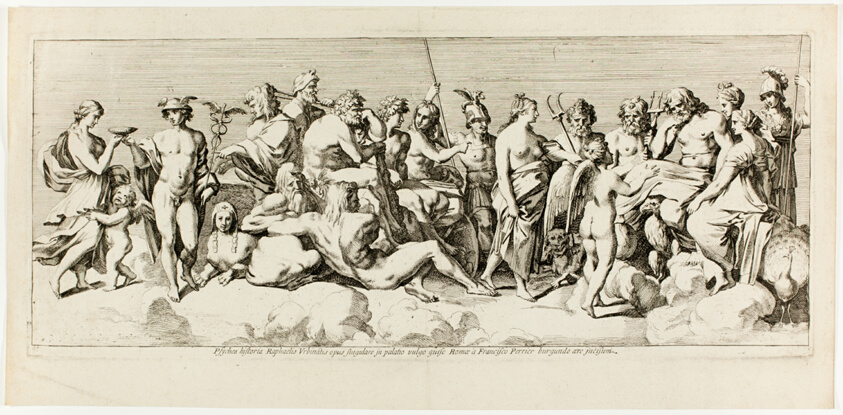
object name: Print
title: History of Psyche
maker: François Perrier (French, 1590-1650); after Raffaello Sanzio, called Raphael (Italian, 1483-1520)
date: 1634/46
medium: Etching on laid paper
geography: France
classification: engraving; print; prints and drawing